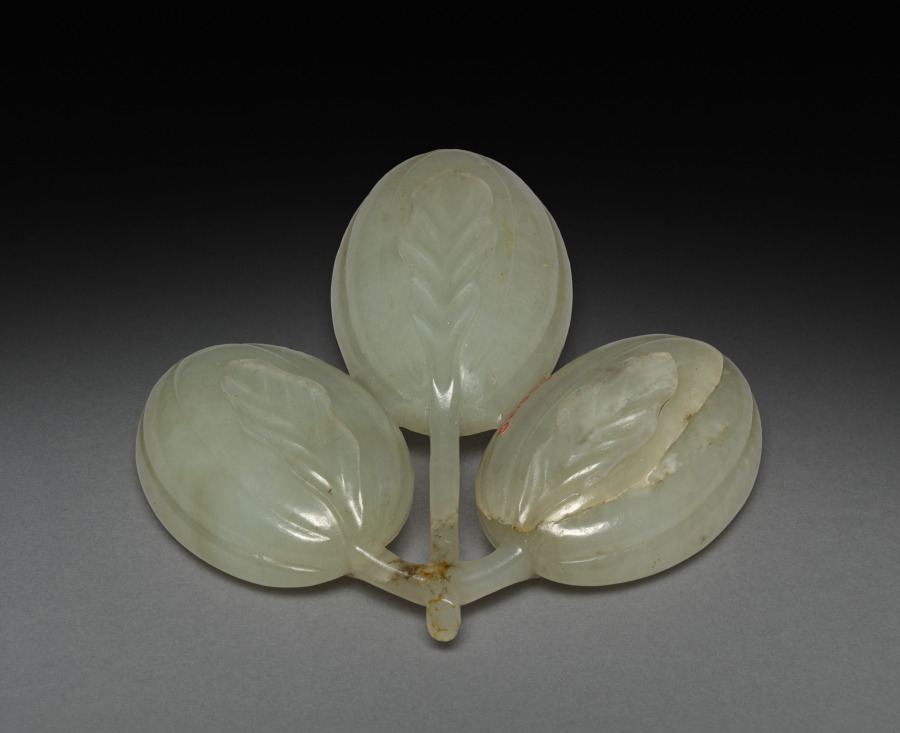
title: Three-Lobed Dish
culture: China, Qing dynasty (1644-1911)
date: 18th Century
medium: jade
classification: Jade